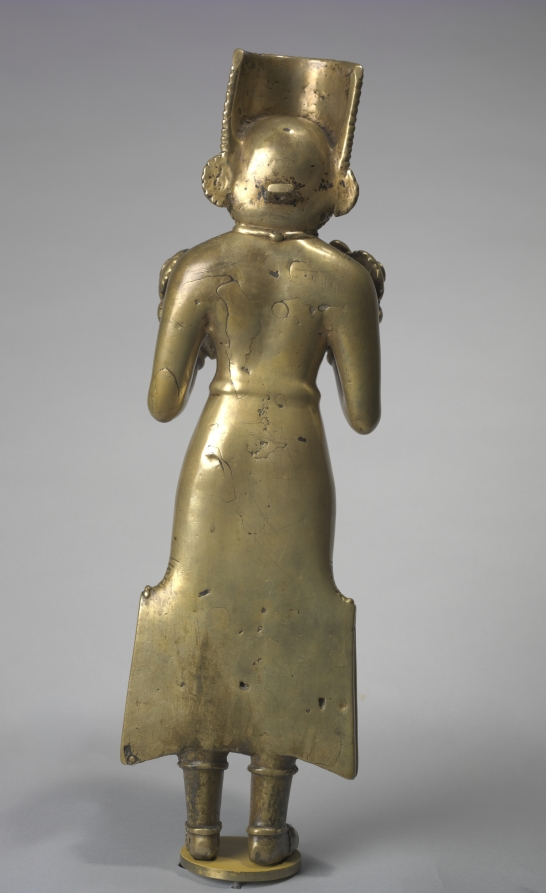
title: Surya, the Sun God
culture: India, Kashmir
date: early 700s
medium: brass with inlaid silver eyes and copper inlaid lips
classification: Sculpture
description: Surya wears a long tunic and boots suitable for riding horses across the grassland steppes of Central Asia. The sun god was of paramount power among the people of Central and Western Asia who followed religions such as Zoroastrianism, a pre-Islamic faith emphasizing a sacred duality between light and dark. When the image of the sun god began to be made in India from the 100s BC on, he is shown in the dress of the people who revered him the most. Surya is worshipped throughout the Indian subcontinent and Himalayan regions of Kashmir and Nepal alongside both Hindu and Buddhist deities.